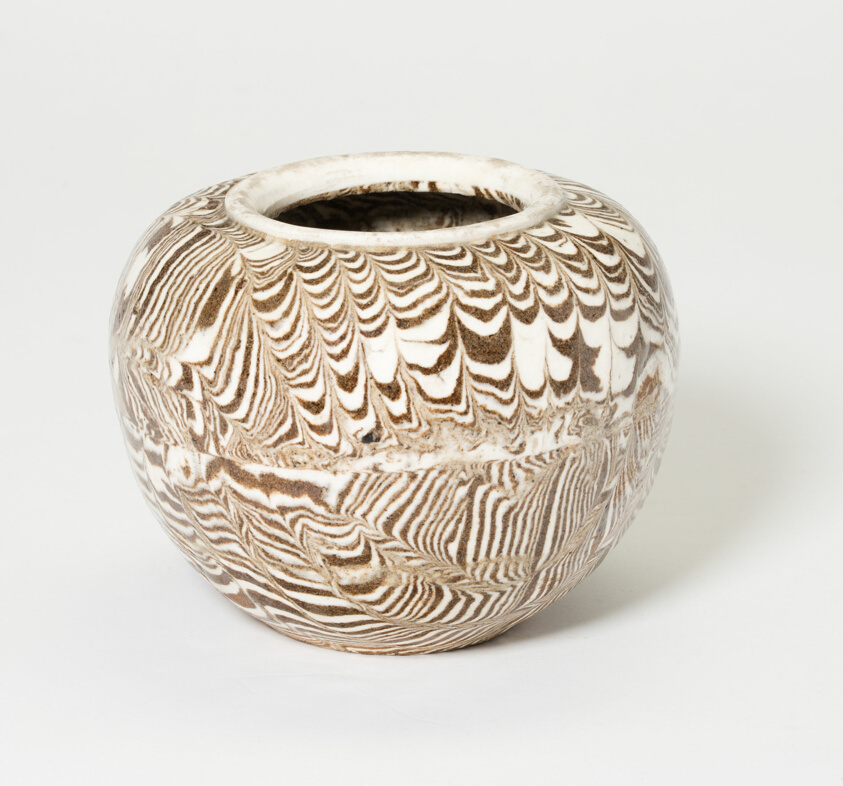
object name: Vessel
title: Jar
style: Chinese (culture or style)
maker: China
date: Tang dynasty (618–907)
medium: Earthenware with marbled slip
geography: China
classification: ceramics; asian art; vessel